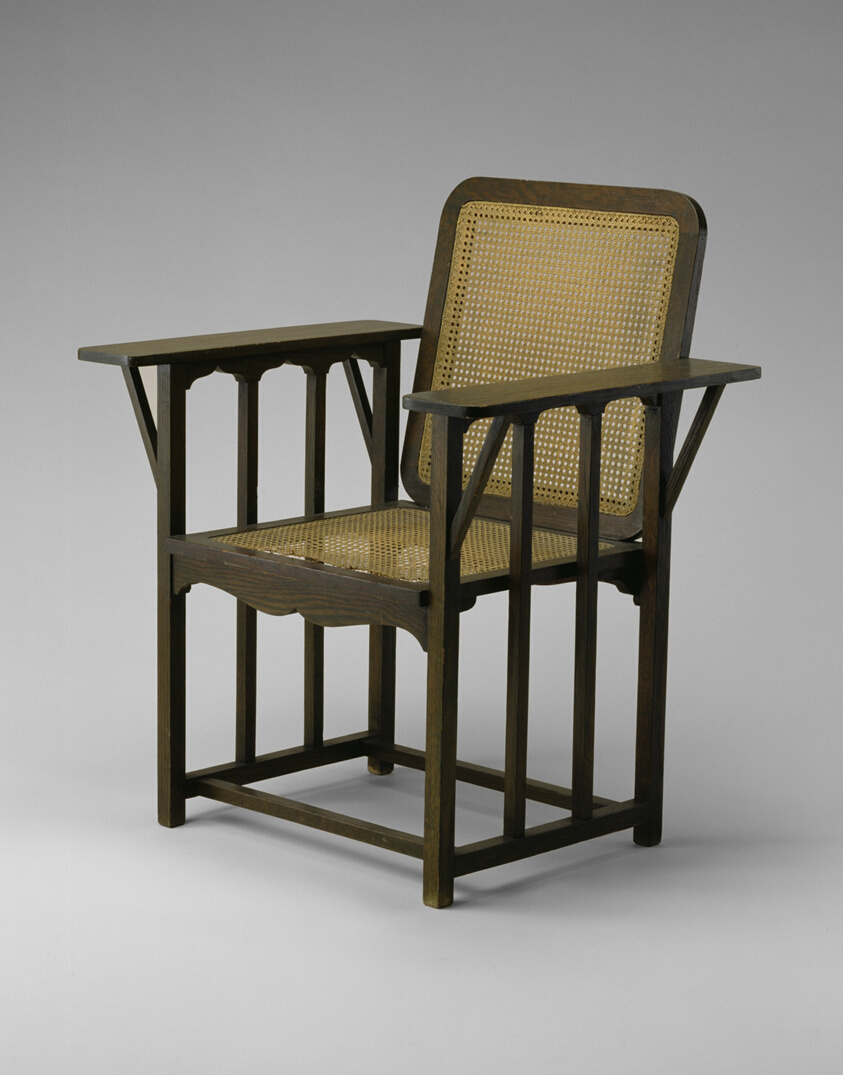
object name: Furniture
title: Armchair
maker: David Wolcott Kendall; American, 1851–1910; Manufacturer: Phoenix Furniture Company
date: 1894–96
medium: Green-stained oak with caned inserts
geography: Michigan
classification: seating; furniture; american decorative arts; american arts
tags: furniture